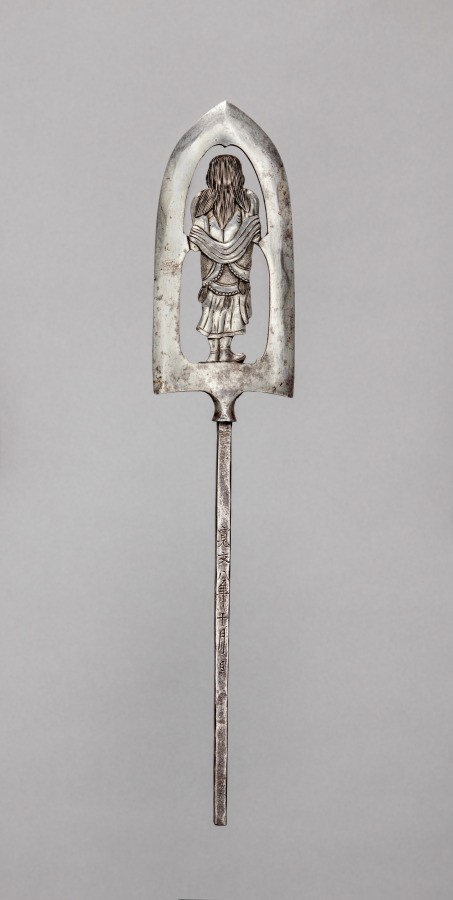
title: Ceremonial Arrowhead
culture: Japan, Edo period (1615–1868)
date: 1668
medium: Steel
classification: Arms and Armor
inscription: front: 城州住忠光作, back: 寛文八年十月日